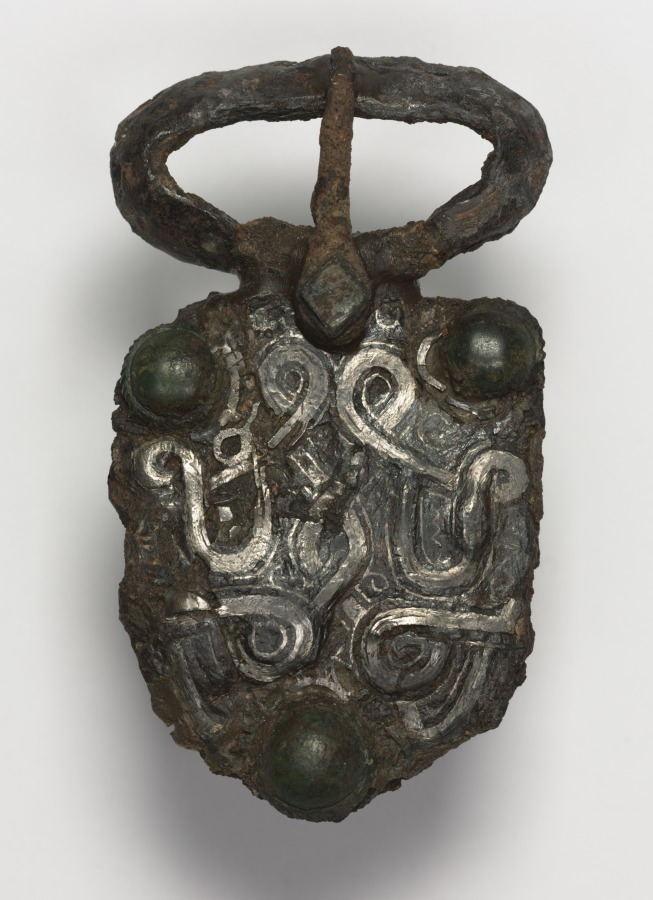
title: Belt Buckle and Tab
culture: Frankish, Migration period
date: 600s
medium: iron with silver overlay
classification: Jewelry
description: This buckle would have been attached to a strip of leather worn around the waist. It was likely both an ornamental statement indicating social rank and a practical accessory. The decorative inlay was applied by forcing silver wire into a pattern engraved into the iron. The condition of the buckle indicates that it was likely excavated, perhaps from a grave.